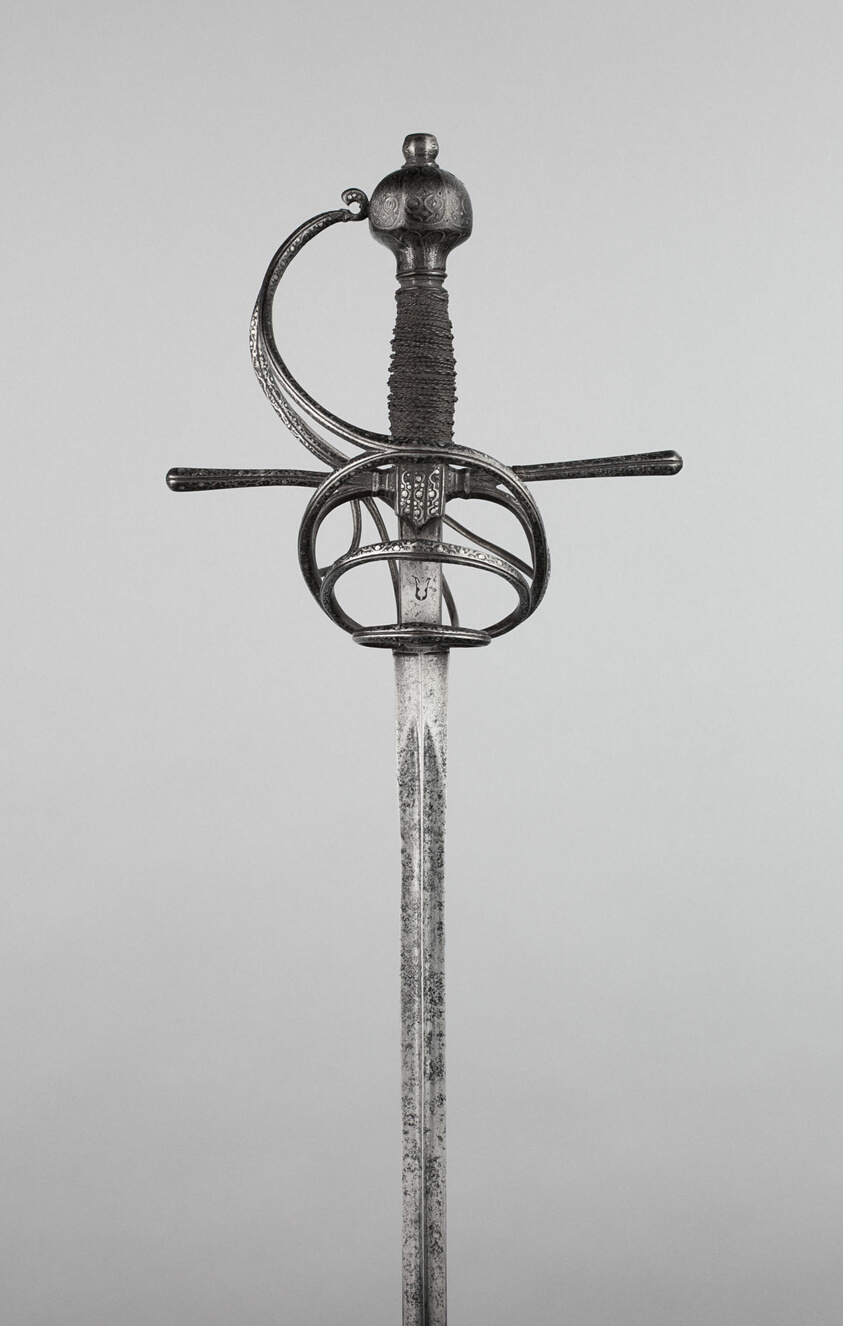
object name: Arms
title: Rapier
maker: Probably Italian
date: 1610-20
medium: Steel and silver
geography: Italy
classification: edged weapon-sword; arms; arms and armor